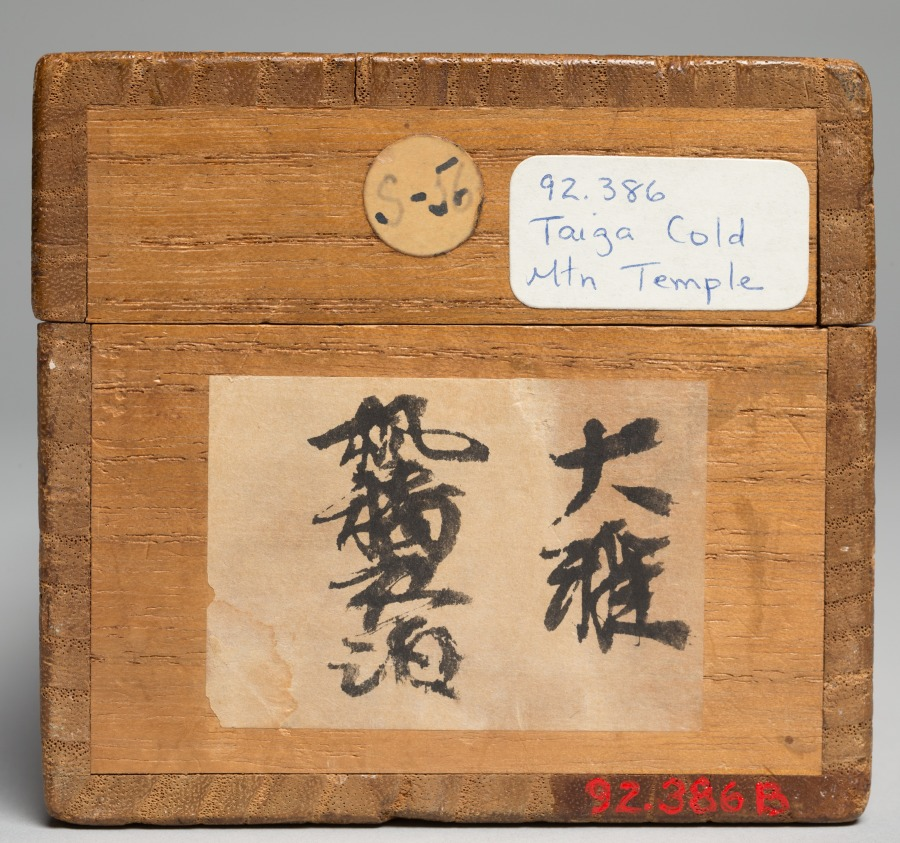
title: Illustration of Zhang Qi's Poem on the Cold Mountain Temple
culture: Japan, Edo period (1615–1868)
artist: Ike Taiga (Japanese, 1723–1776)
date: mid- to late 1700s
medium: hanging scroll; ink and color on paper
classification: Painting